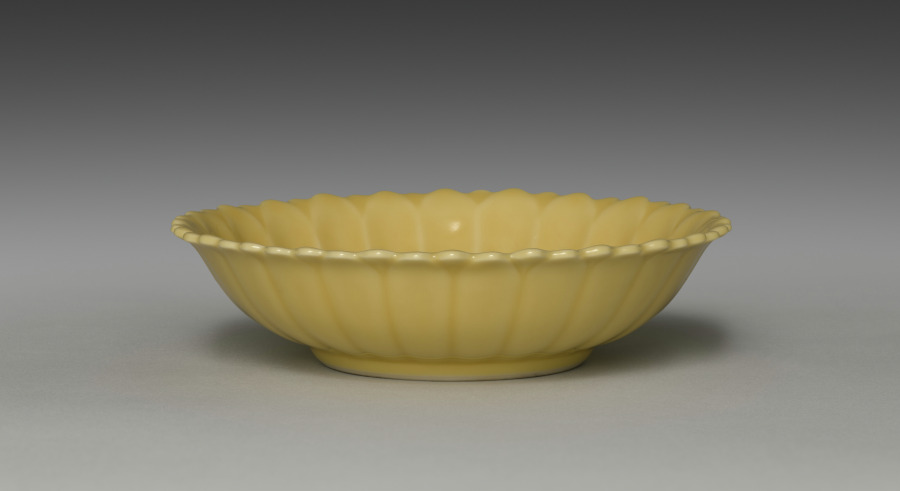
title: Chrysanthemum-Shaped Dish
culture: Japan, Taishō period (1912–26)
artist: Seifū Yohei IV (Japanese, 1872–1951)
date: 1914–46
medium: Porcelain with yellow glaze and molded decoration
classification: Ceramic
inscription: 清風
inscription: 清風造 【印】 清風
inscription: 【印】 清風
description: Like his father, Yohei IV also produced works with red or yellow monochrome glazes. His yellow-glazed works include this sweets bowl molded into the shape of a chrysanthemum, a set of five drinking cups CMA 2022.217, and a pair of sake pourers CMA 2022.216.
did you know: Seifū Yohei IV won a gold medal at the 1915 Panama-Pacific International Exposition in San Francisco for his ceramics.